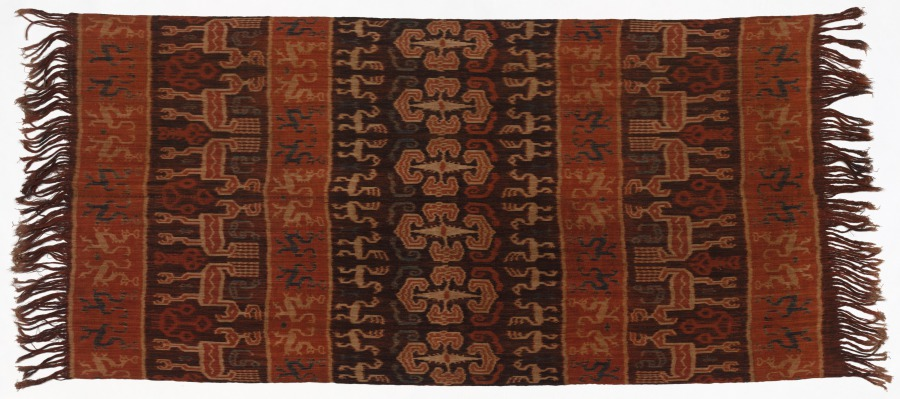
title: Hinggi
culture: Indonesia, Sumba, 19th century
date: 1800s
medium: warp ikat; cotton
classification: Textile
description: Hinggi are large mantles woven in identical pairs, one worn around the waist and the other draped over the shoulder. As is characteristic of Sumbanese "hinggi," the design of this mantle relates to the traditional animistic religious and social structure of Sumba: the division of the cloth into horizontal bands reflects the layout of the traditional Sumbanese village, the rampant lions denote royal power, the trees of life between the cockatoos are symbols of fertility, and the geometric figure repeated across the center of the cloth is a symbol of royalty.